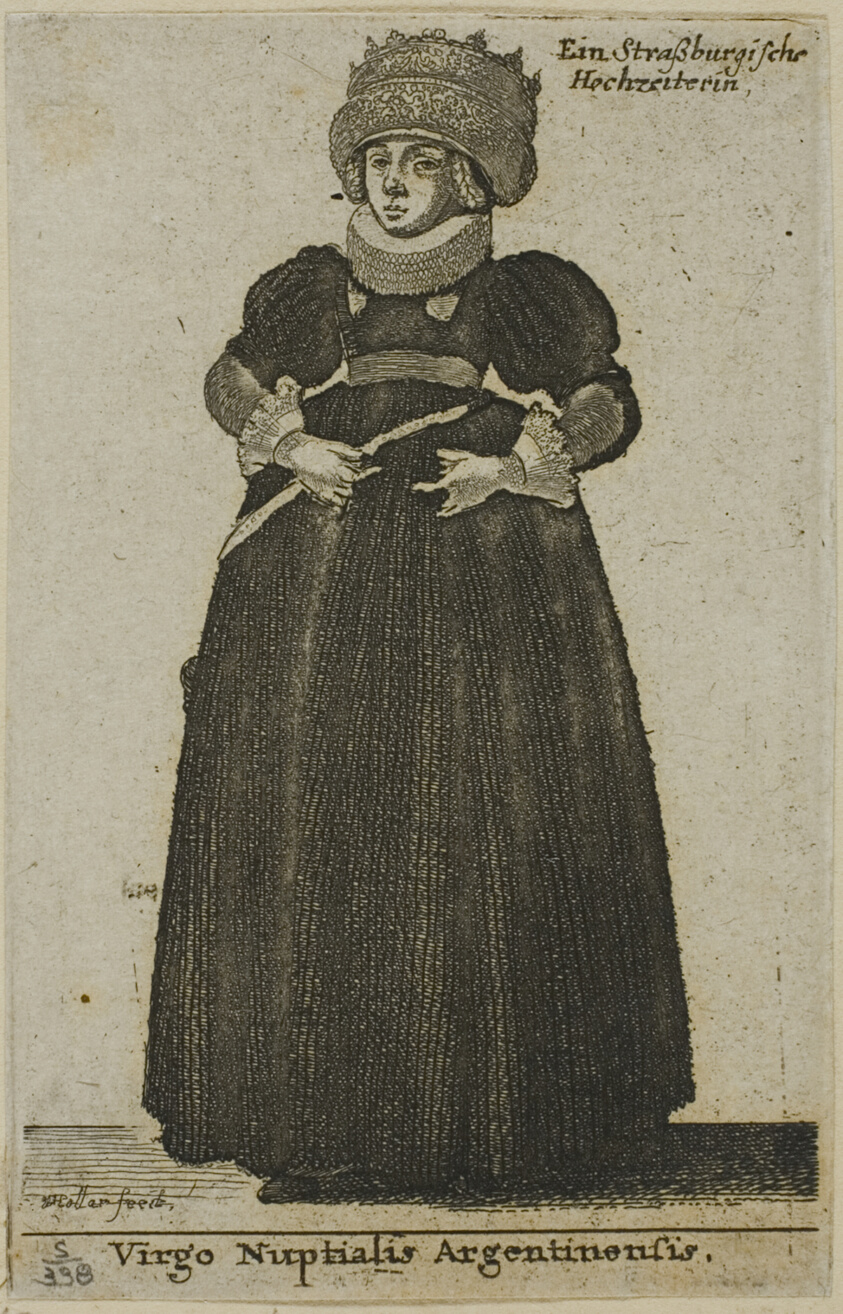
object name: Print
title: Strasbourg Woman in Wedding Dress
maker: Wenceslaus Hollar (Bohemian, 1607-1677)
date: 1644–50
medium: Etching on gray Asian paper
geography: Bohemia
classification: etching; print; prints and drawing